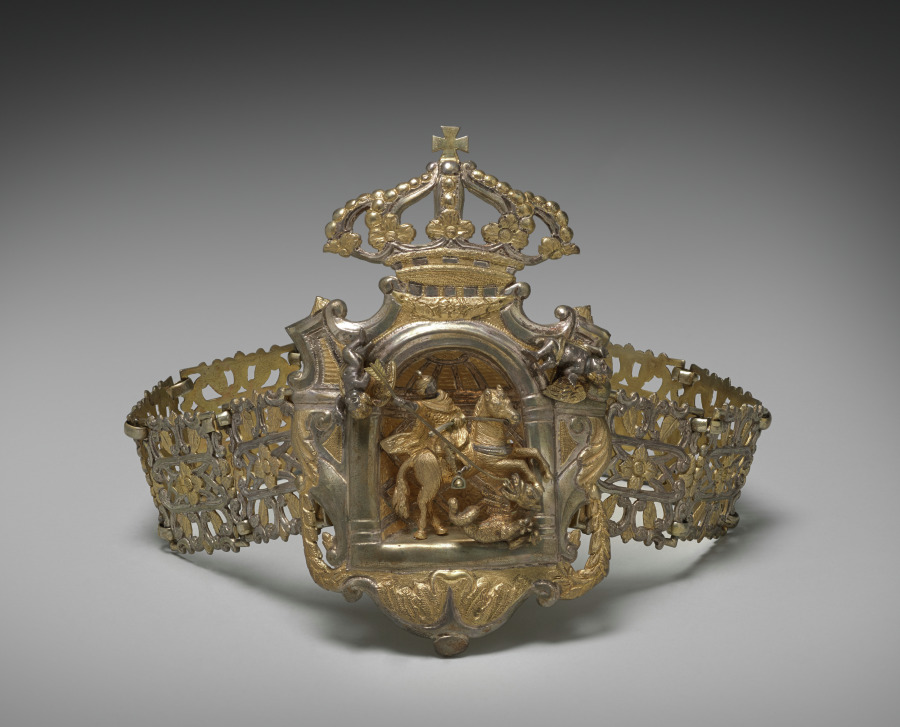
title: Woman's Costume (Metal Belt)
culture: Italy, Sicily, 19th century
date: 1800s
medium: metal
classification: Metalwork